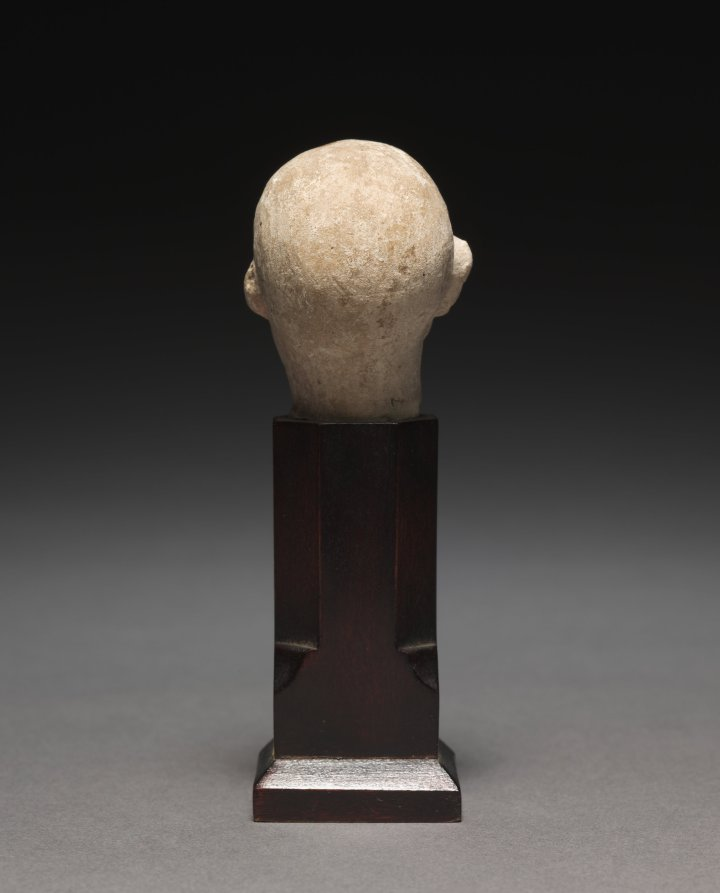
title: Small Head of a Man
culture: Egypt, Greco-Roman period (332 BCE–395 CE), Ptolemaic dynasty (305–30 BCE)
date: 305–30 BCE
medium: limestone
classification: Sculpture